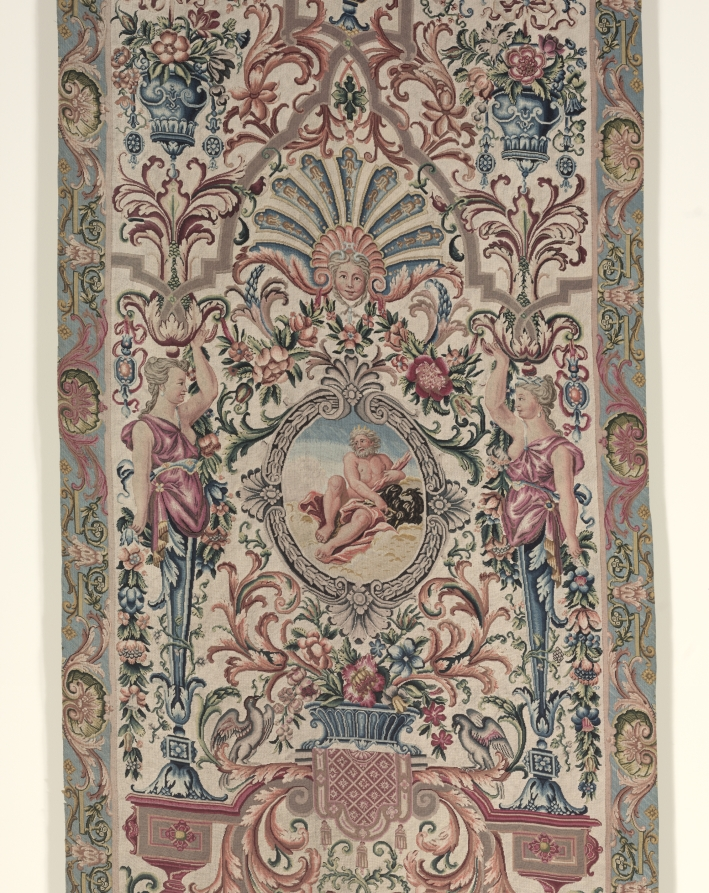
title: Needlework Bed Hanging (2 of 2)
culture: France, late 17th century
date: c. 1690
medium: petit point embroidery; silk and wool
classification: Embroidery